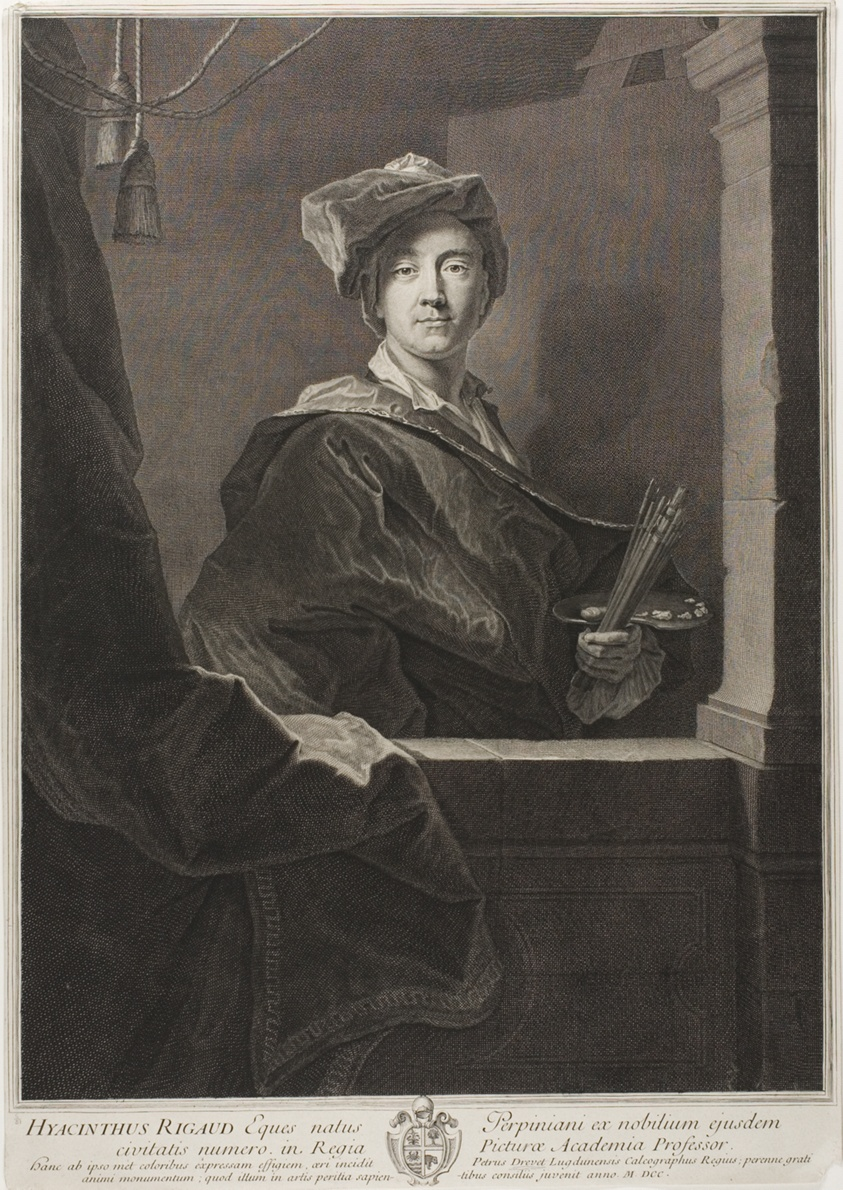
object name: Print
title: Portrait of Hyacinthe Rigaud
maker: Pierre Drevet (French, 1663-1738); after Hyacinthe Rigaud (French, 1659-1743)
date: 1700; printed posthumously after 1780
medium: Engraving on ivory wove paper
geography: France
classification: engraving; prints and drawing; print